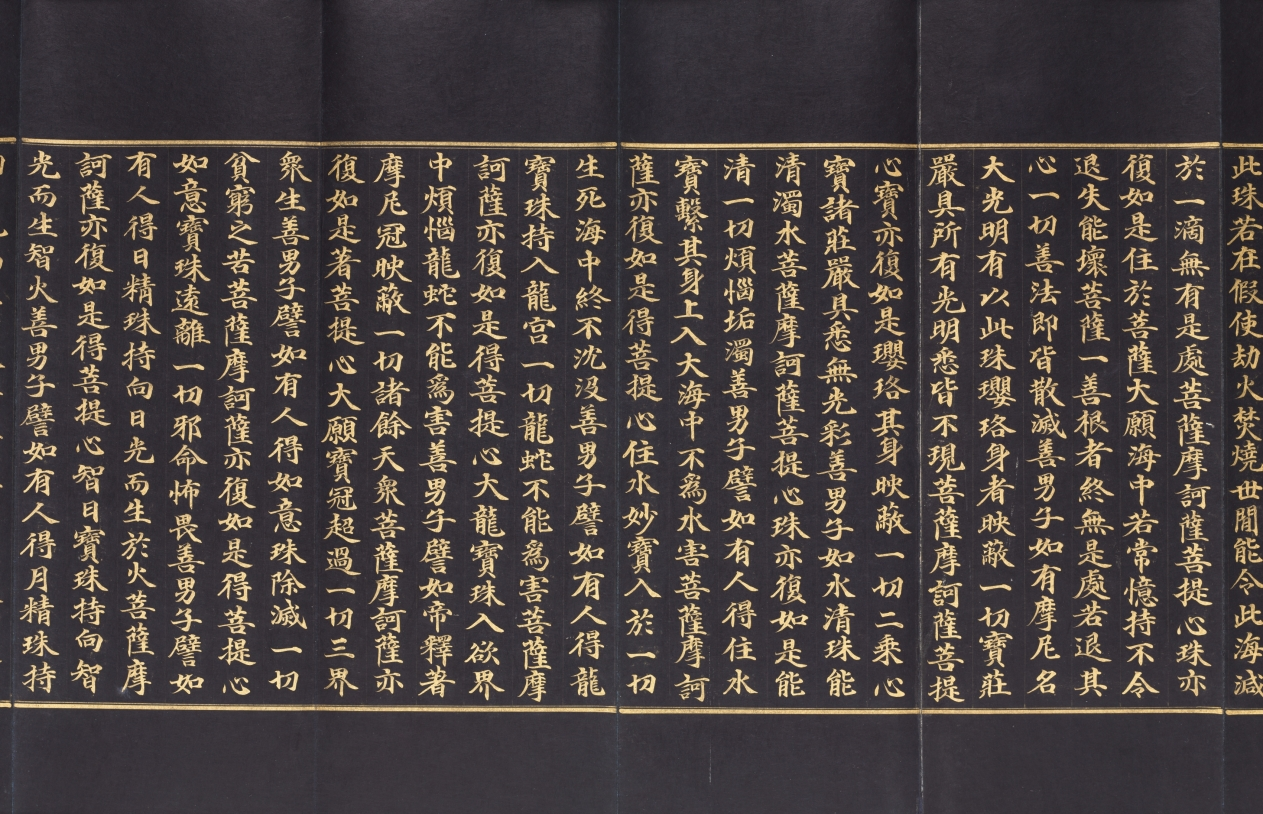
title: Avatamsaka Sutra No. 78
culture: Korea, Goryeo dynasty (918–1392)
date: 1300s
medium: Folded book with illustrated frontispiece; gold and silver on mulberry paper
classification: Bound Volume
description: This illuminated manuscript presents one part of the multivolume sacred text titled Avatamsaka (Flower Garland) sutra. Both the script and the image are rendered in gold ink on the smooth surface of the dark blue, indigo-dyed mulberry paper. This portion of the text, which reads from right to left, describes the encounter of the Buddha of the Future (Maitreya) and the young pilgrim Sudhana. The Buddha gives his words of wisdom to Sudhana, who asks questions about the path toward spiritual awakening. Mixed with ink and glue, the gold has a brilliance that strikingly reflects Sudhana’s ardent quest for understanding the way to reach enlightenment.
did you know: The pristine condition of this manuscript indicates that it was rarely used after its creation, revealing that the act of making a manuscript rather than reading it was the main religious goal.